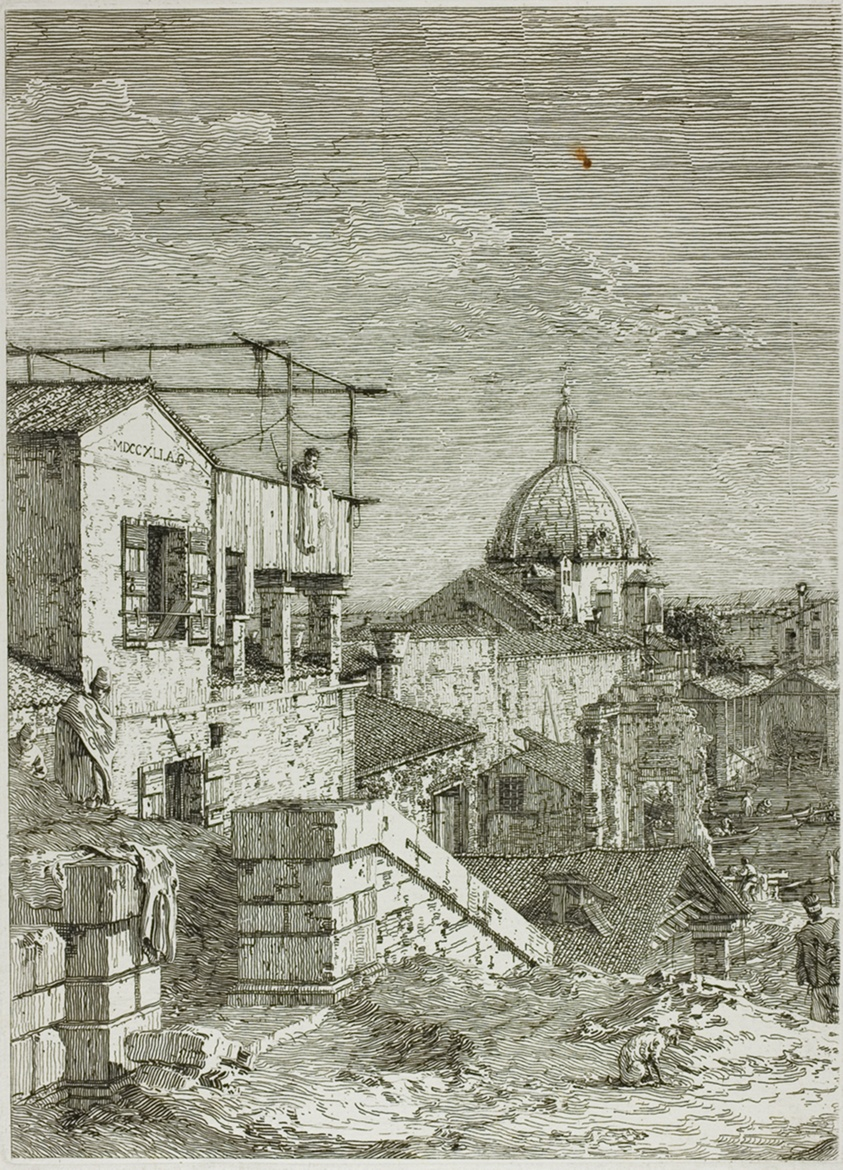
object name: Print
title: The House with the Inscription and The House with the Peristyle, from Vedute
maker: Canaletto (Italian, 1697-1768)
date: 1735/44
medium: Etching in black on ivory laid paper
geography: Italy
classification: etching; print; prints and drawing